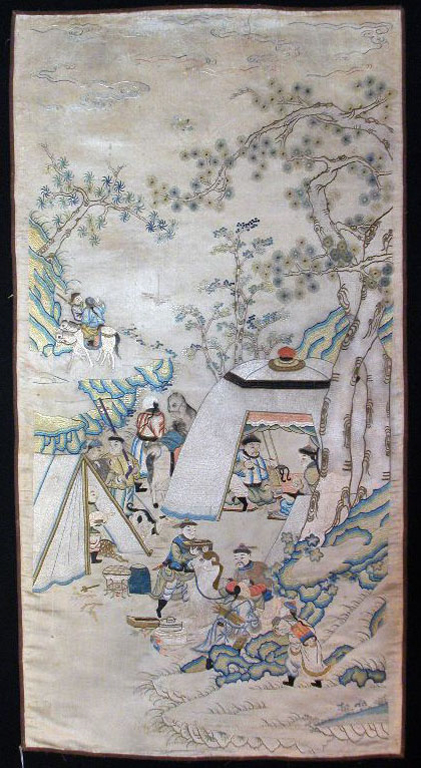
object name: Textile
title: Picture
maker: China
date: 18th/19th century, Qing dynasty (1644–1911)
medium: Silk, satin weave; embroidered with silk and gold-leaf-over-lacquered-paper strip wrapped cotton in satin, single satin and stem stitches; laidwork and couching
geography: China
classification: textile; needlework (visual works); weaving